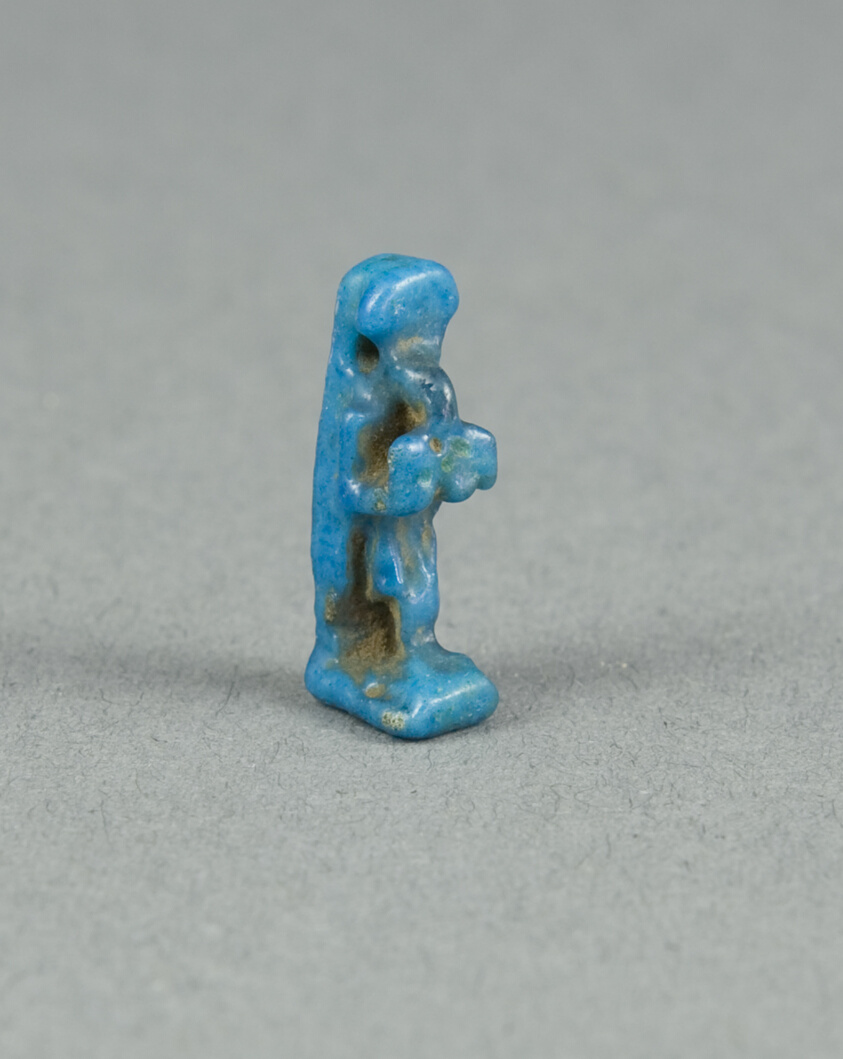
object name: Costume and Accessories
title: Amulet of the God Thoth Holding an Offering Table (?)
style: egyptian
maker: Egyptian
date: Late Period (about 664–332 BCE)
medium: Faience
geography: Egypt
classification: amulet; jewelry; ceramics; ancient art; costume; faïence (composite material)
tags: gods (deities)